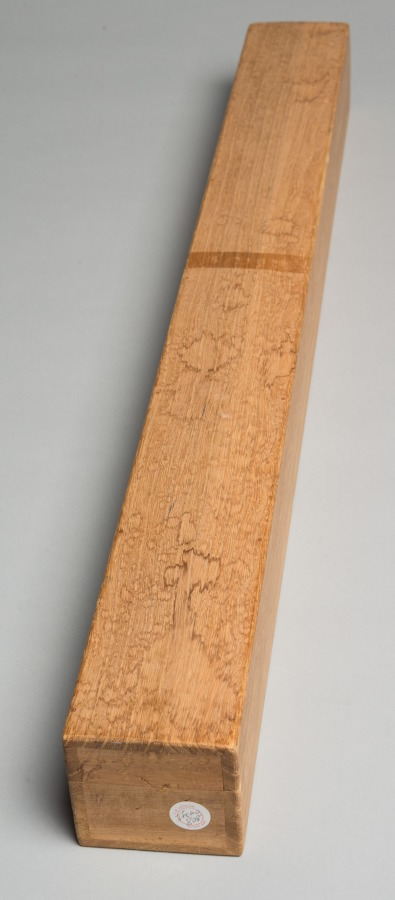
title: Daoist Immortal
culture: Japan, Edo period (1615–1868)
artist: Hanabusa Itchō (Japanese, 1652–1724)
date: 1615–1868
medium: hanging scroll, ink and color on paper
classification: Painting